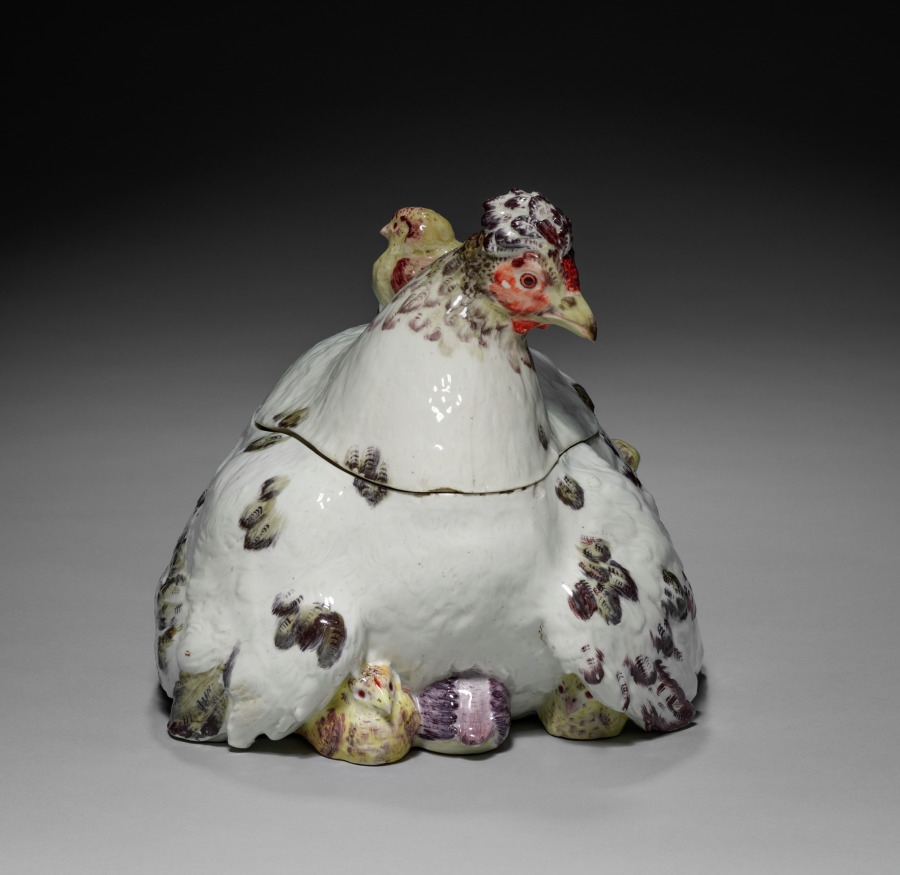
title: Hen and Chicks Covered Tureen on Stand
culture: England, London, Chelsea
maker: Chelsea Porcelain Factory (Britain, London, 1745–84)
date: c. 1755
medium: soft-paste porcelain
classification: Ceramic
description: The ceramic factory at Chelsea, located along the river Thames in western London, was Britain’s most renowned factory of decorative porcelain in the mid-1700s. Large tureens in the form of chickens or rabbits appealed to wealthy aristocrats, who took great care in developing specimen animal and poultry breeds on their country estates. The design for this particular tureen was taken from a popular seventeenth-century print by Francis Barlow depicting a farmyard.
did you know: Though the form of a soup tureen suggests a functional role at the dining table, such large, expensive porcelains were probably only used for decoration because hot liquids might have easily caused them to crack.